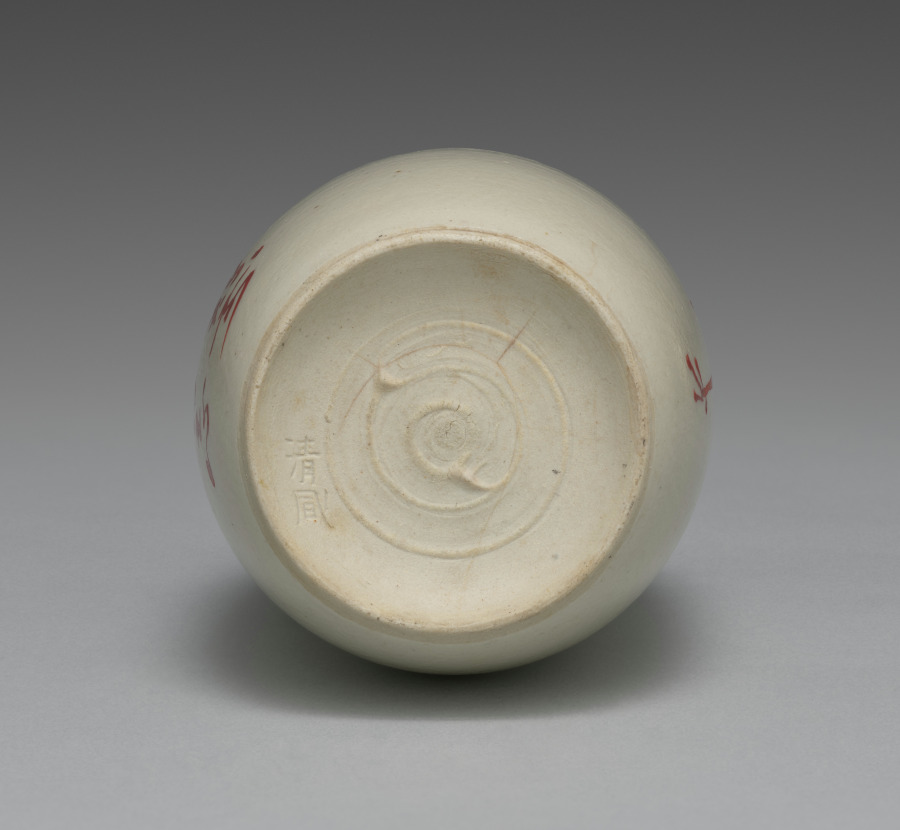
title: Crane Sake Pourer from Sake Pourers with Crane and Tortoises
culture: Japan, Meiji period (1868–1912)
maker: Seifū Yohei III (Japanese, 1851–1914)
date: 1893–1914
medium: One of a pair of sake flasks; porcelain with overglaze color enamel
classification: Ceramic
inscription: 爭食羣雞前，同遊者同志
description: This flask has a crane with a leg raised, while the other flask of this pair has stencil-like paintings of three turtles—a young one with its parents. Cranes and turtles are well-recognized symbols of longevity in East Asia, with the turtle said to live for ten thousand years and the crane for one thousand. Each flask also has a poem on the back, one in Chinese and the other in Japanese. The Chinese poem on this crane flask is two nonconsecutive five-character lines from a poem called “Crane Feelings” by the famous Tang dynasty poet Bai Juyi (772–846). One character in one of the lines has been altered. This creative poetic sampling results in a verse reading zheng shi qun ji qian, tong you zhe tong zhi 爭食羣雞前，同遊者同志. It could perhaps be translated, “before the flock of chickens competing for food, those traveling together have the same ambitions.”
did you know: This pair of seemingly humble sake pourers celebrate longevity and delight in a literary tradition that embraces multiple forms of poetic expression.